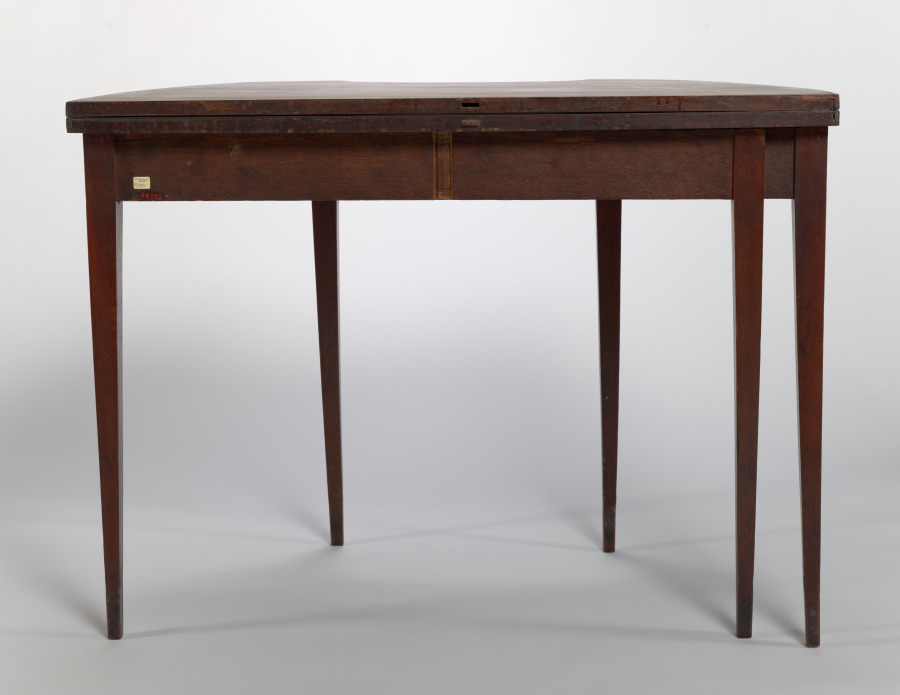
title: Game Table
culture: America, Maryland, Baltimore, early 19th Century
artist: style of George Hepplewhite (American, 1786)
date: c. 1800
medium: mahogany with inlays of various woods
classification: Furniture and woodwork